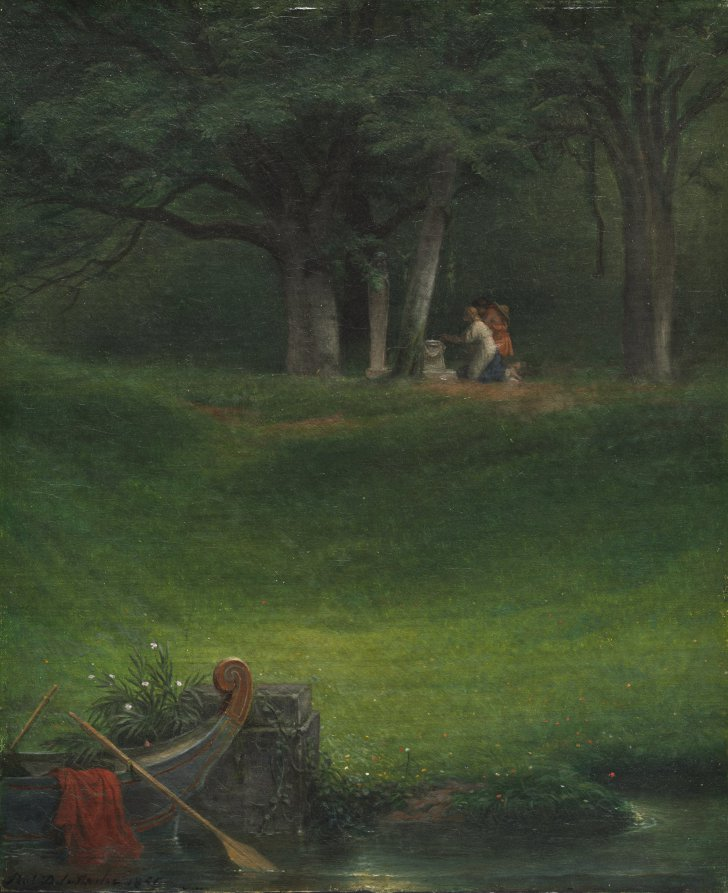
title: Offering to the God Pan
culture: France, 19th century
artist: Paul Delaroche (French, 1797–1856)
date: 1855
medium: oil on fabric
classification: Painting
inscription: Signed lower left: Paul DelaRoche 1855